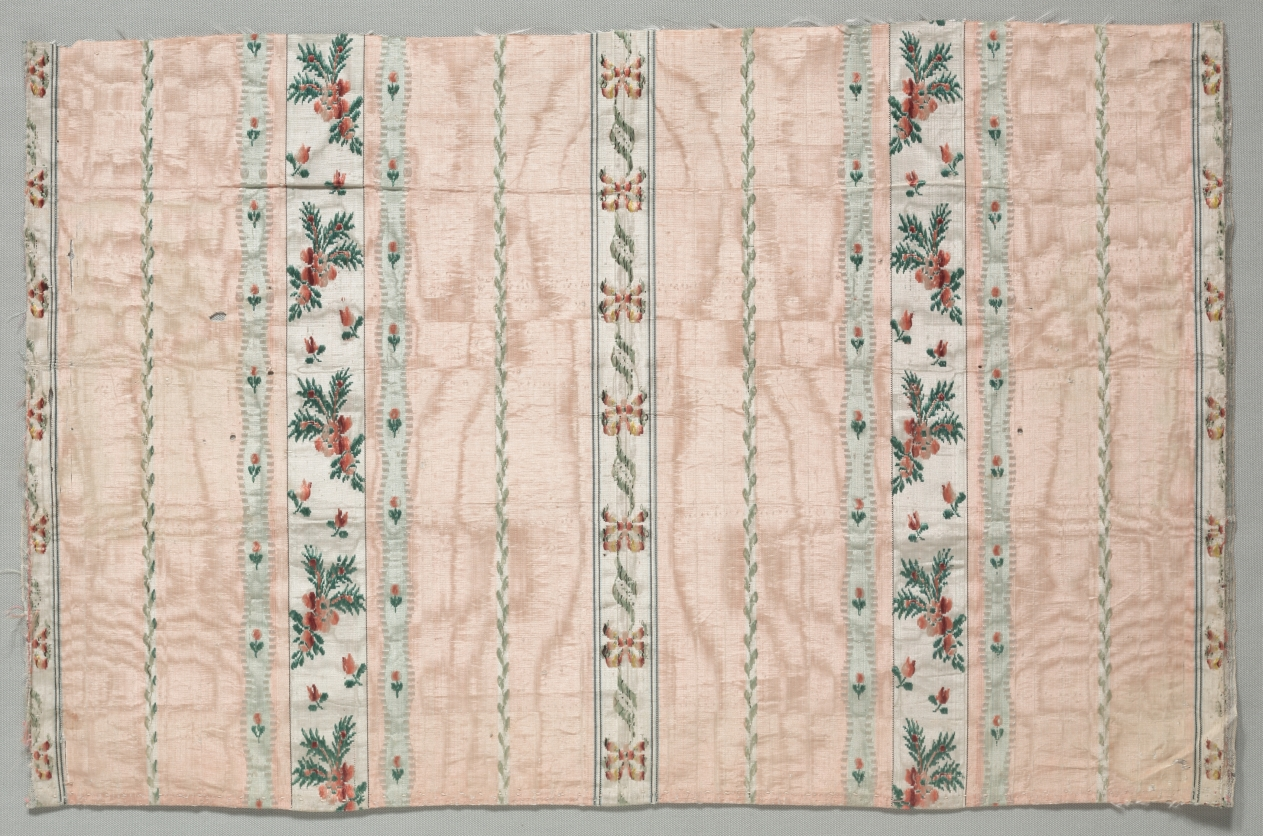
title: Taffeta, Brocaded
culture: France, late 18th century, Period of Louis XVI (1774-1793)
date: late 1700s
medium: watered silk, brocaded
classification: Textile